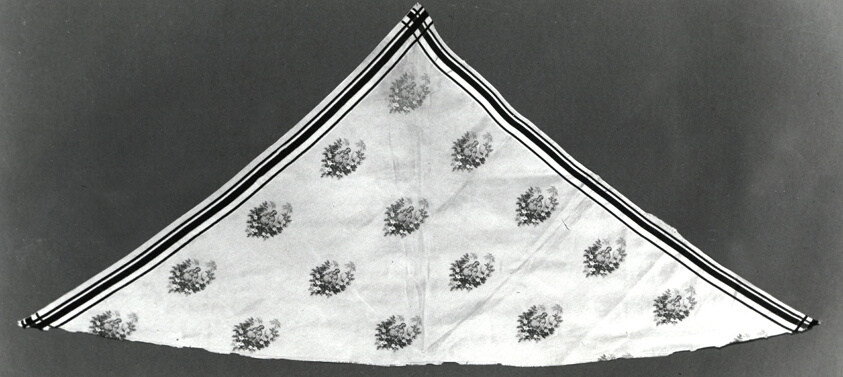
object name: Textile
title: Handkerchief (One Half)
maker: France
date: c. 1850/60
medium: Silk, plain weave; brocaded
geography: France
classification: textile; weaving; accessories (object genre)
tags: fashion